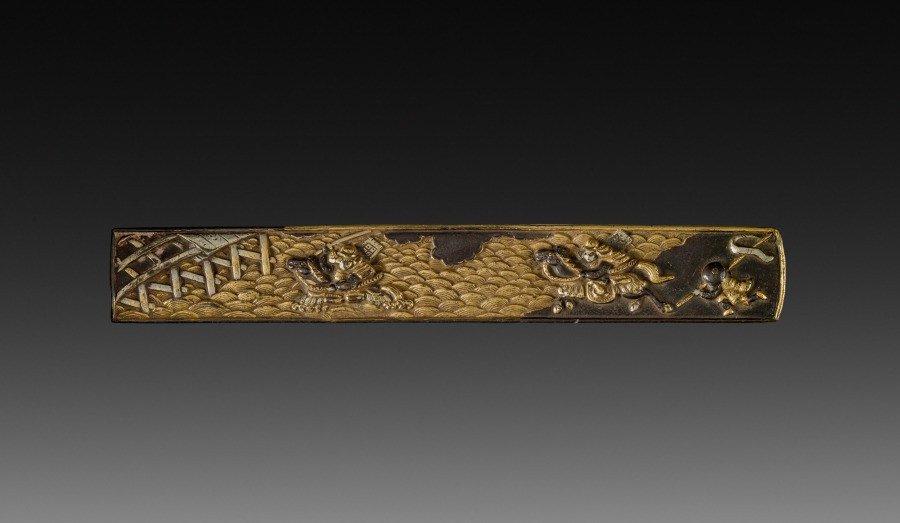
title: Knife Handle (Kozuka)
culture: Japan, Edo period (1615–1868)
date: early to mid-1800s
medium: inlaid bronze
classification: Metalwork